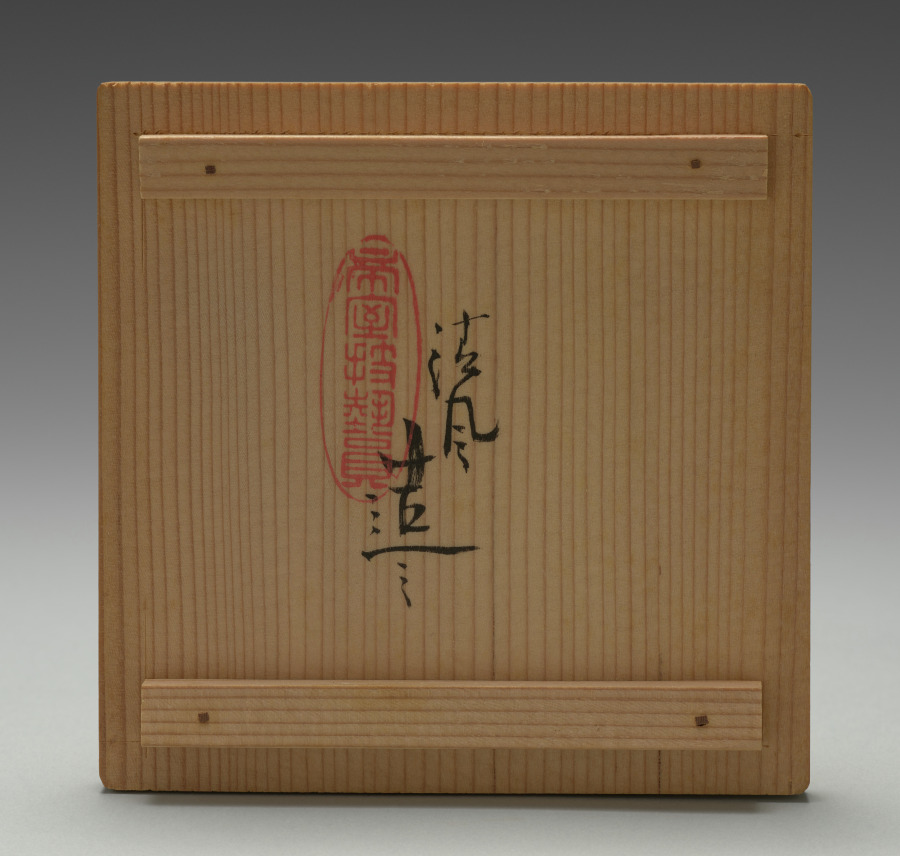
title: Hand-held Teapot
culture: Japan, Meiji period (1868–1912)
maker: Seifū Yohei III (Japanese, 1851–1914)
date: 1893–1914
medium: Porcelain with molded and carved design and cream glaze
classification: Ceramic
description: This teapot is of a variety used by advanced sencha practitioners. Called a hōhin, the pot is designed to be held directly by the fingers, with the body touching the upper part of the palm. This shape allows the host to manipulate the pot with a single hand and demonstrate dexterity. Direct contact between the ceramic body and the hand allows the host to closely gauge the temperature of the water within. There are differing grades of sencha, and for the finest one, gyokuro, the water temperature must be carefully regulated to achieve the proper flavor. This vessel is therefore efficacious for preparing this high-quality tea. The hōhin is also extremely portable, so it is well suited for impromptu gatherings. According to its box, this teapot is an example of taihakuji. “Great-white porcelain” was an important early invention Yohei III devised in 1972. It involved the combination of a distinctive translucent, creamy glaze over an ivory-colored clay body.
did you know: This pot’s restrained design includes on the lid’s handle a yin-yang motif, symbolizing the ideal balance between the forces of the universe.